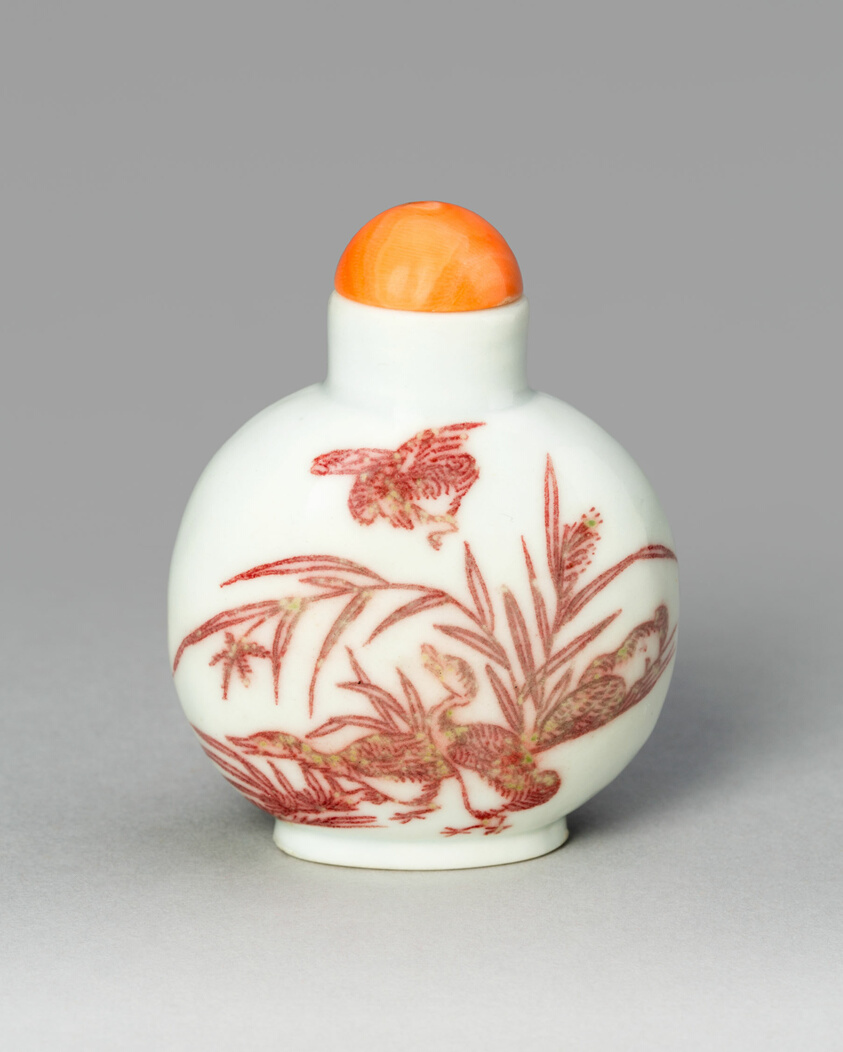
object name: Vessel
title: Snuff Bottle with Geese and Reeds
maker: China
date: Qing dynasty (1644–1911), 1800–1900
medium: Porcelain painted in underglaze copper red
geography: China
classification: snuff bottle; ceramics; asian art; vessel